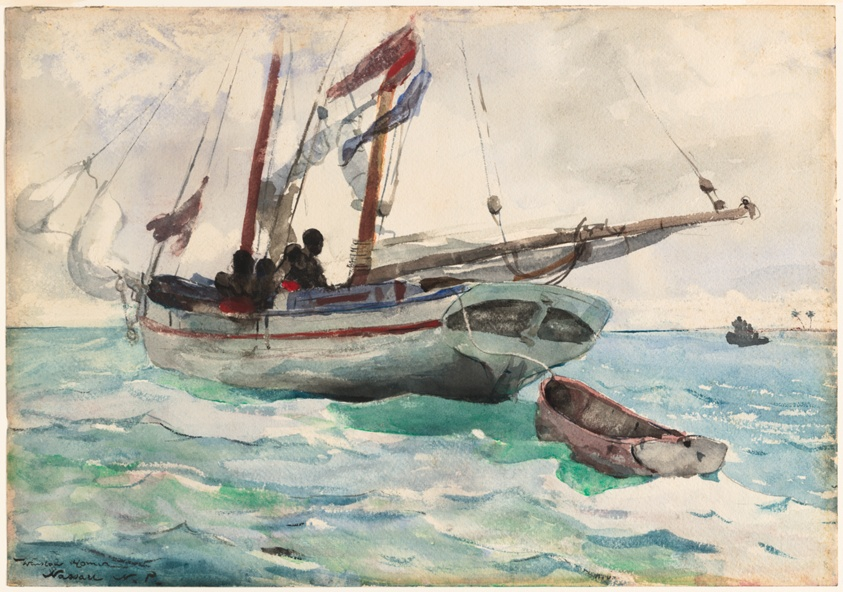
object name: Drawing and Watercolor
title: Schooner - Nassau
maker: Winslow Homer (American, 1836-1910)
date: 1898/99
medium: Transparent watercolor, with traces of opaque watercolor, rewetting, blotting and scraping, over graphite, on thick, rough twill-textured, ivory wove paper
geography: United States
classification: watercolor; drawings (visual works); prints and drawing